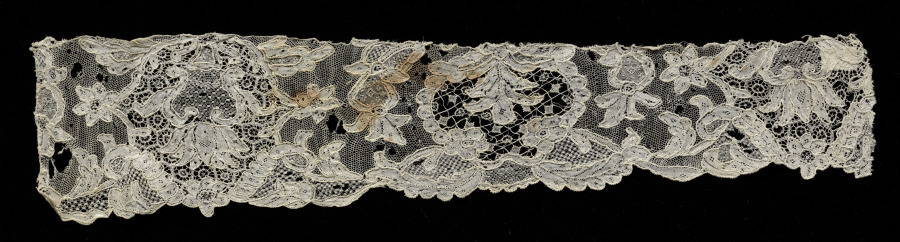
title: Lace Edging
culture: France, Alençon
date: 1700s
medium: Linen: needle lace (Point d' Alençon)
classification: Lace